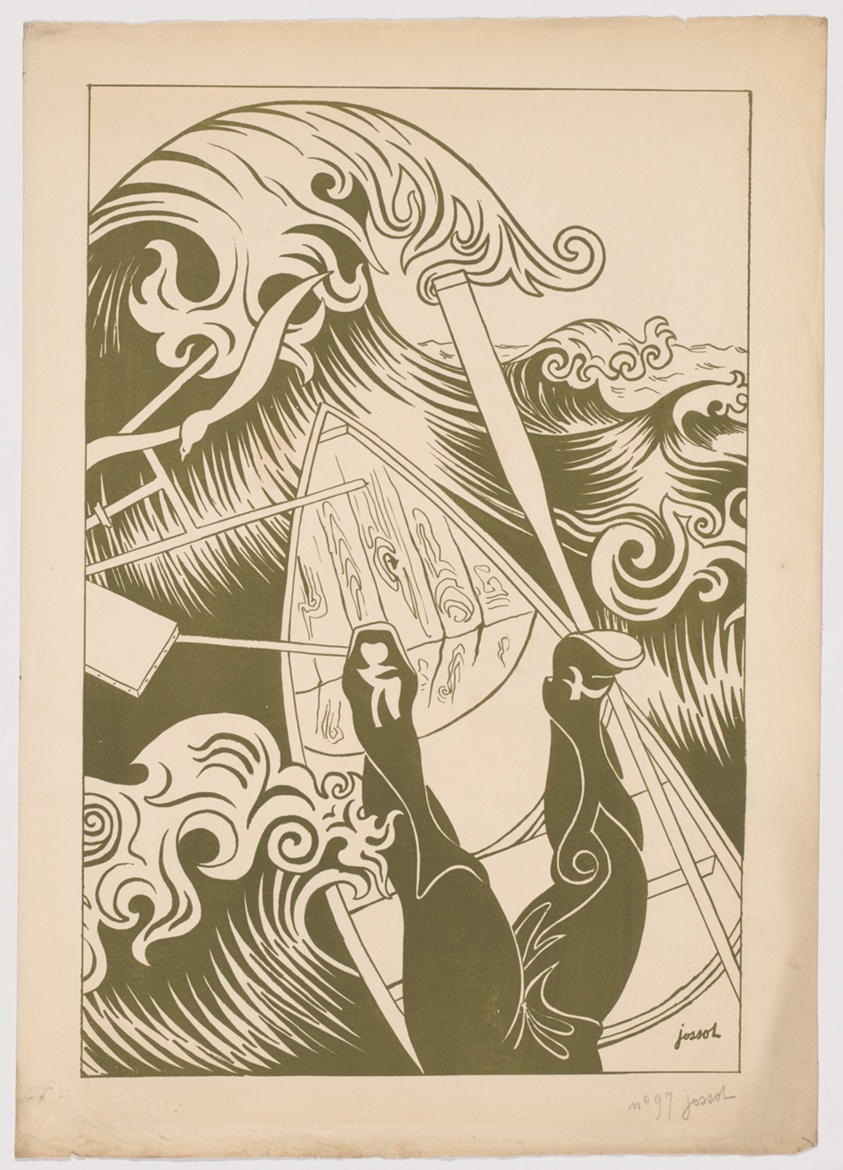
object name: Print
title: The Wave (La vague)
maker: Henri Gustave Jossot (French, 1866–1951); published by L’Estampe Originale (French, 1893–1895)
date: April-June 1894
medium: Lithograph in green on cream laid paper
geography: France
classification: print; lithograph; paper; prints and drawing